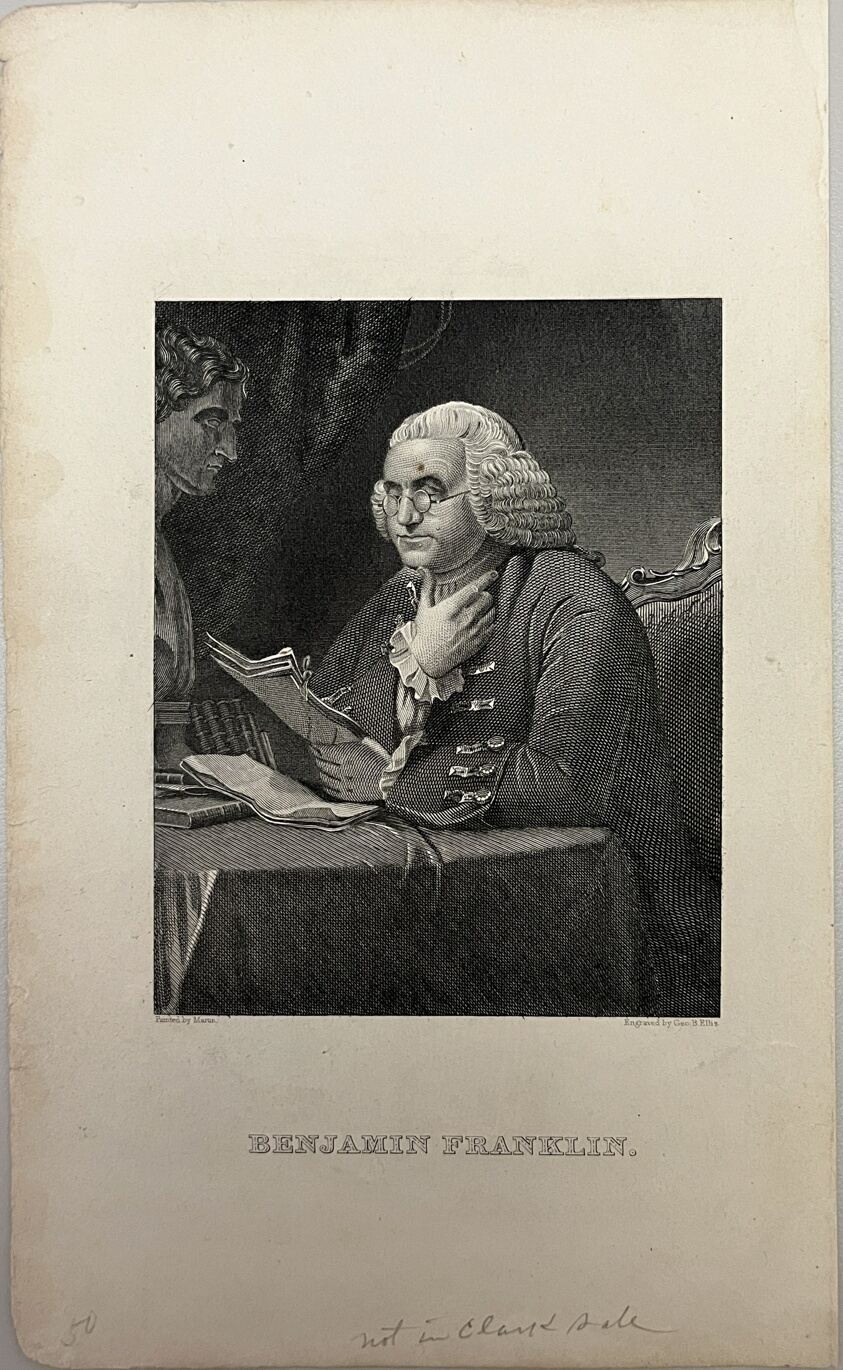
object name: Print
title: Benjamin Franklin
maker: George B. Ellis (American, active 1821-1838); after Martin (likely American, 19th century)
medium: Etching on paper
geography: United States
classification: reproduction; print; prints and drawing